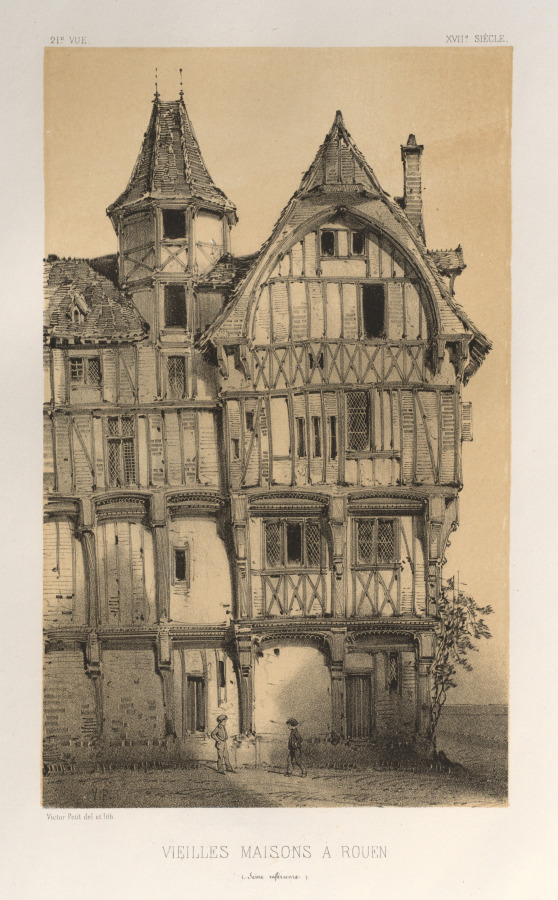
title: Architecture Pittoresque ou Monuments des xveme. Et xvieme. Siecles: Chateaux De France des XV et XVI Siecles: Pl. 21, Vielles Maisons A Rouen (Seine-Inferieure)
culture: France, 19th century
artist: Victor Petit (French, 1817–1874)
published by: Charles Boivin (publisher and editor); Lith de Godard a Paris (printer)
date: published 1860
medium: lithograph with tint stone, from portfolio of 100 lithographs with tint stone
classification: Print